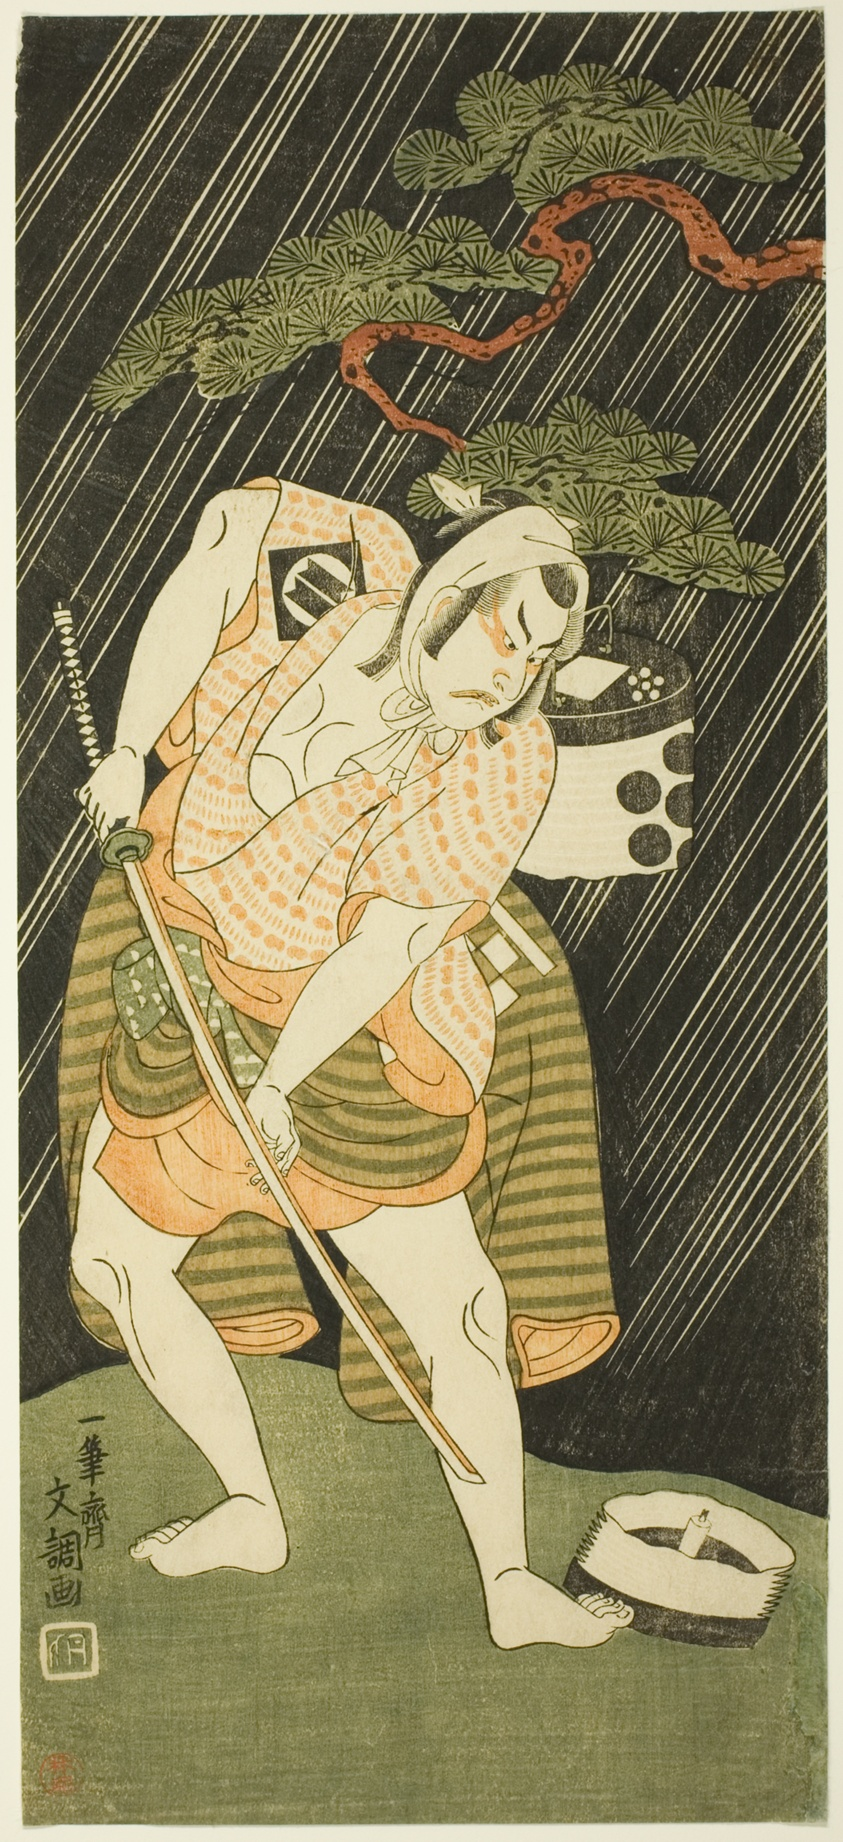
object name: Print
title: Sakata Sajūrō I as a Samurai’s Manservant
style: Japanese (culture or style)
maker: Ippitsusai Bunchō; Japanese, active c. 1755-90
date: c.1770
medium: Color woodblock print; hosoban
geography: Japan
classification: woodblock print; print; asian art